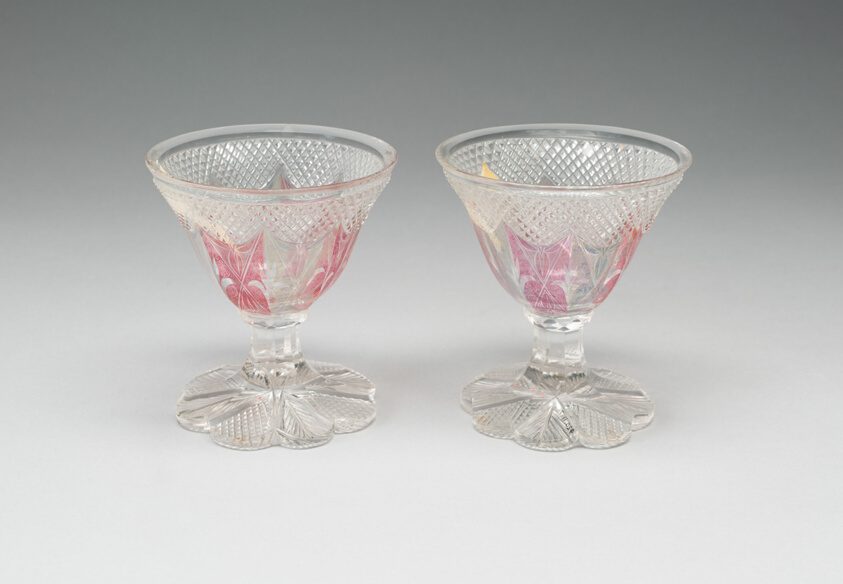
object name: Glass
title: Set of Two Wine Glasses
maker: Friesland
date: 19th century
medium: Glass; blown, molded, cut and engraved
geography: Friesland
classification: drinking vessel; glass; european decorative arts